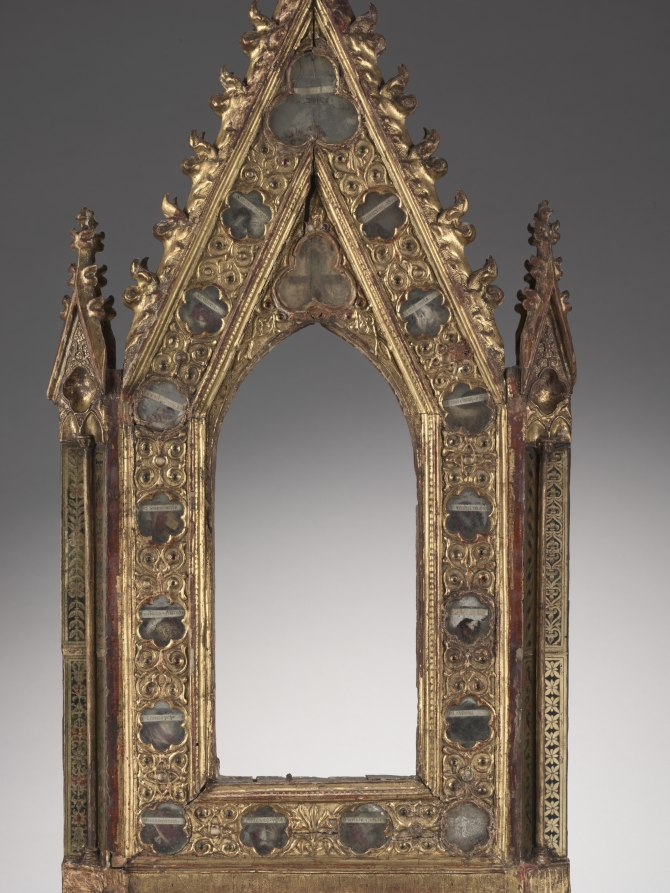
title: Frame for a Portable Reliquary Icon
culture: Italy, Siena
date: 1347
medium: gilded wood, modeled gesso, verre églomisé, glass cabochons, and relics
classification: Glass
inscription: an inscription with a stipled background runs around the lowest edge of the upright part of the frame: obverse: HOC/OPUS : FACTUM . FUIT . SUB . ANNO . DO/MINI; reverse: [small loss] /CCC . XLVII . TEMPORE . DOMINI . MINI/CINI. [This/work : has . been . made . under . year . of . the . Lord [small loss] /300 47 . in . the . time . of the Lord . Mini/Cini.] Another inscription appears on the obverse and reverse of the base: LUCAS ME FECIT. [Luke has made me.]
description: In the Middle Ages relics were thought to possess extraordinary power and were enshrined in lavish vessels called reliquaries. This complex frame once contained a painted image on each side, believed to be the Madonna and the Crucifixion, both long since lost. These images were surrounded by 17 carefully labeled relics, still visible. Intentionally portable, such votive objects could be easily carried from room to room or building to building as needed. A Latin inscription around the base reads: This work has been made under the year of the Lord CCCXLVII [1347] in the time of the Lord Mini/Cini. The inscription likely refers to Mino Cinughi, rector of the Hospital of Santa Maria della Scala in Siena, 1340-51. The Cinughi coat of arms as well as those of the hospital appear on the base. Another inscription, LUCAS ME FECIT (Luke made me), appears on both sides of the base. While this object probably resided on an altar in the hospital, the fact that it has two sides suggests it was carried aloft in processions.